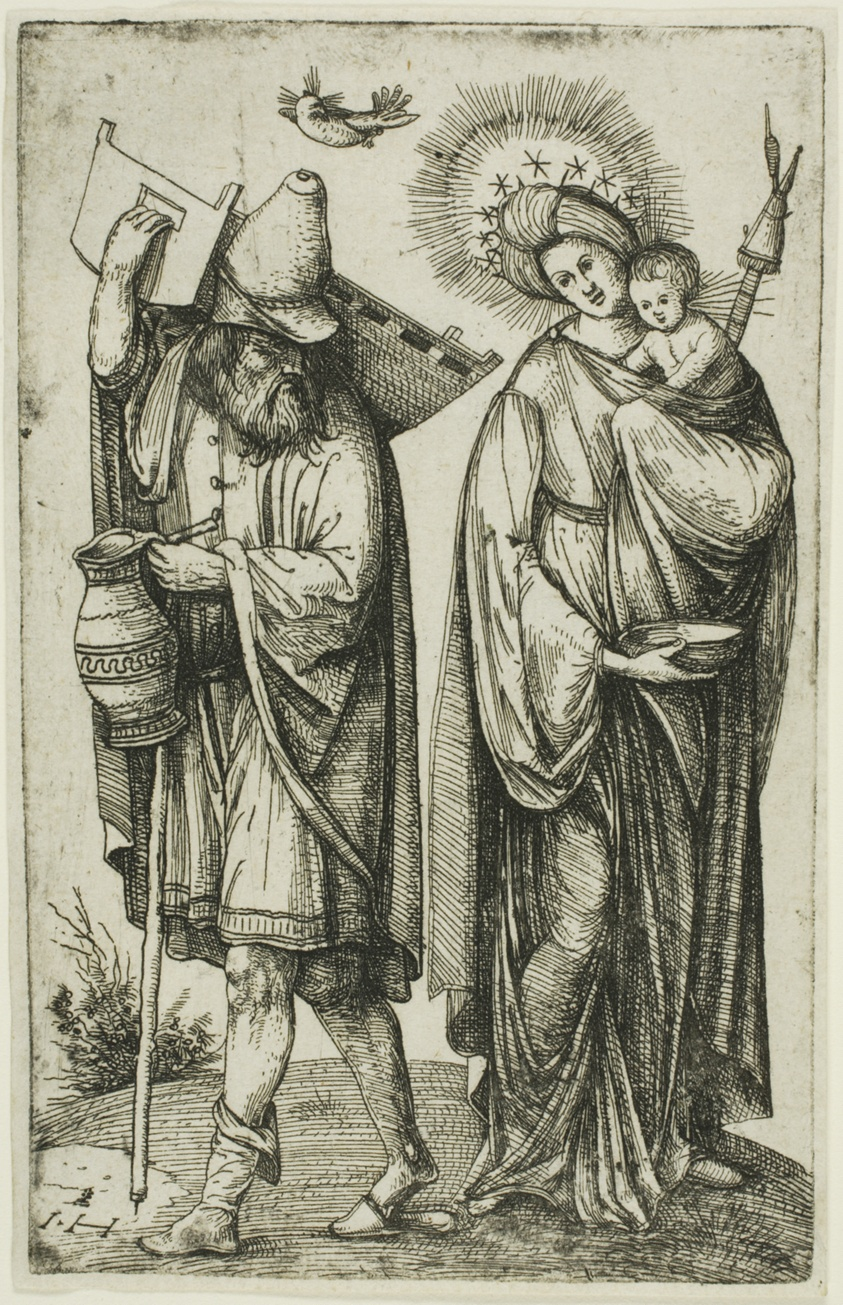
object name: Print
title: The Holy Family with the Dove of the Holy Ghost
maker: Hieronymous Hopfer (German, active 1520-1550); after Jacopo de' Barbari (Italian, c. 1460/70-before 1516)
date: c. 1528-1563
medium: Etching on paper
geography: Germany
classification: etching; print; prints and drawing